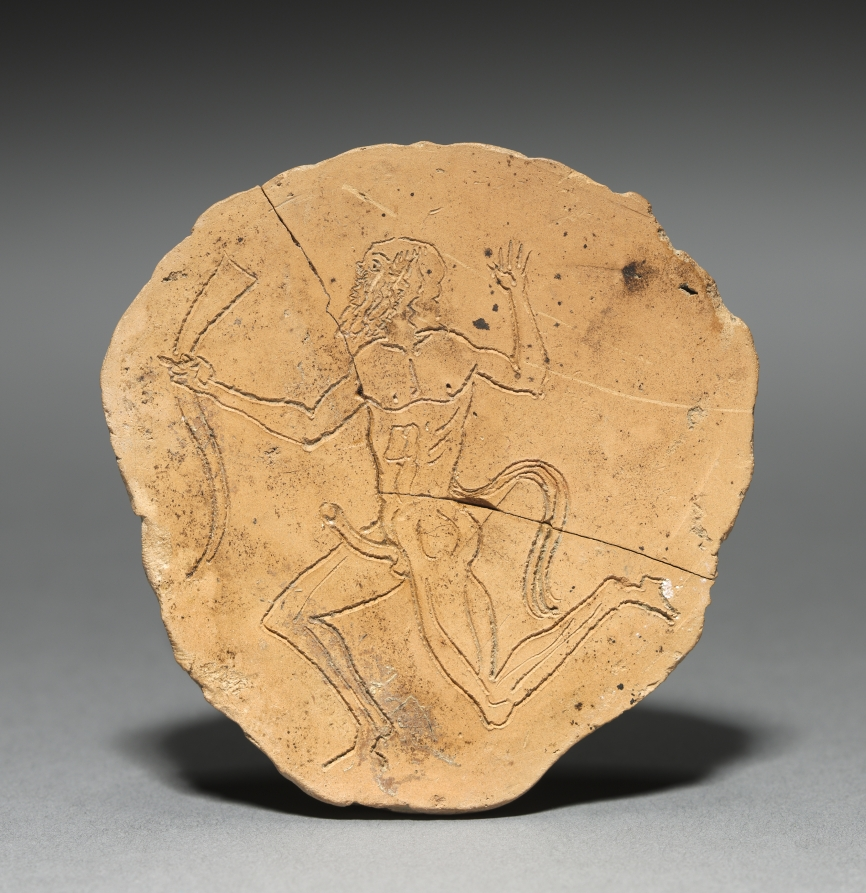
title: Gorgoneion Plaque with Incised Figure of a Dancing Satyr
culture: Greece, South Italy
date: c. 525–475 BCE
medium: terracotta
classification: Sculpture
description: Probably meant to decorate the outside of a wooden coffin or other tomb furniture, this small mold-made terracotta plaque is one of two in the collection (click here for the other). Both bear gorgoneia, or frontal Gorgon faces, with snaky hair, sharp teeth, and protruding tongue, perhaps meant to ward off evils. Curiously, this plaque also features decoration on its back side, in the form of a spirited dancing satyr incised into the clay before firing. Since this satyr would not have been visible once the plaque was in place, its purpose is uncertain. Was it simply diversion for the artisan who made it, or meant to protect the spirit of the deceased?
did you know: This plaque includes a very rare ancient sketch: a satyr incised on the reverse surface.